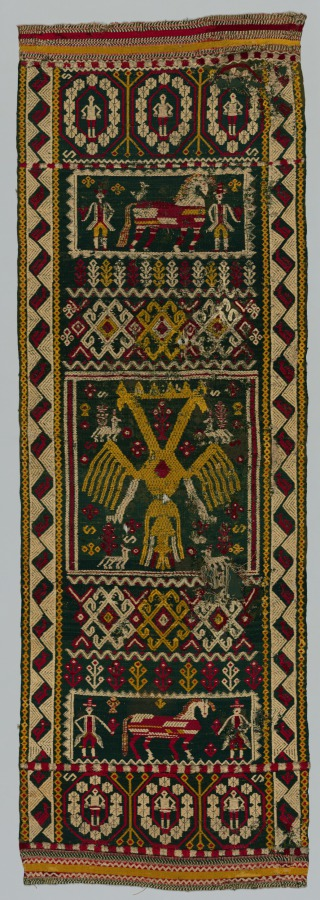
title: Woven Chest or Bed Cover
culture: Italy, Terra di Lavoro, 18th century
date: 1700s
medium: embroidery; wool on linen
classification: Textile